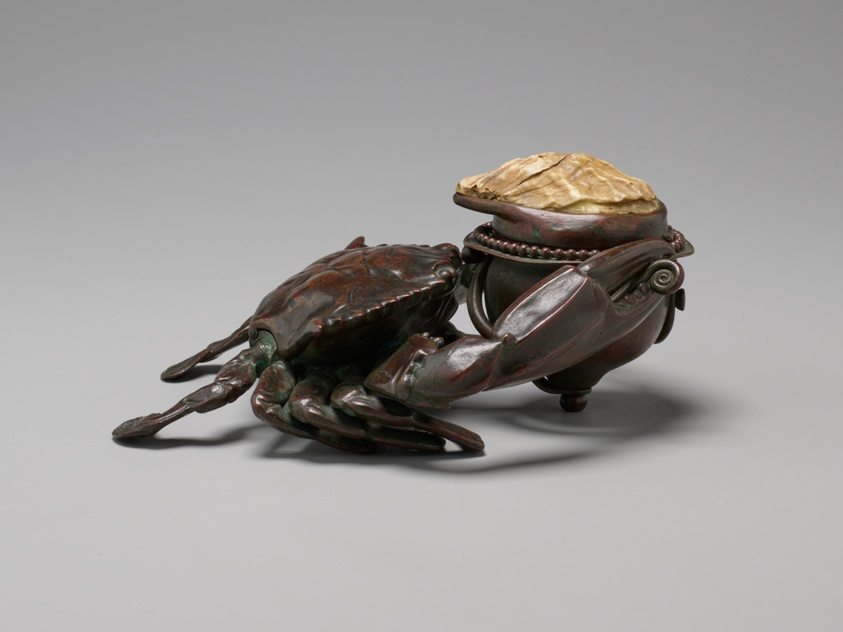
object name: Metalwork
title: “Crab” Inkstand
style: Arts and Crafts Movement, 20th Century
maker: Tiffany Studios (American, 1902–32); Corona, New York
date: c. 1905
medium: Bronze, Favrile glass, and shell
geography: Corona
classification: inkwells; inkwell liners; inkstand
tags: crabs, shells